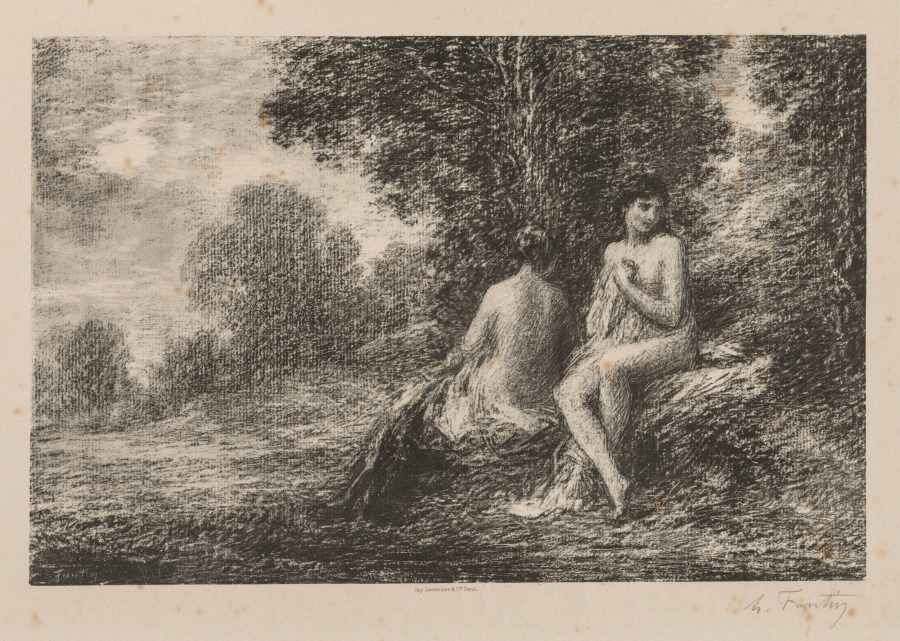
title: Bathers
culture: France, 19th century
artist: Henri Fantin-Latour (French, 1836–1904)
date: 1881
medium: lithograph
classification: Print